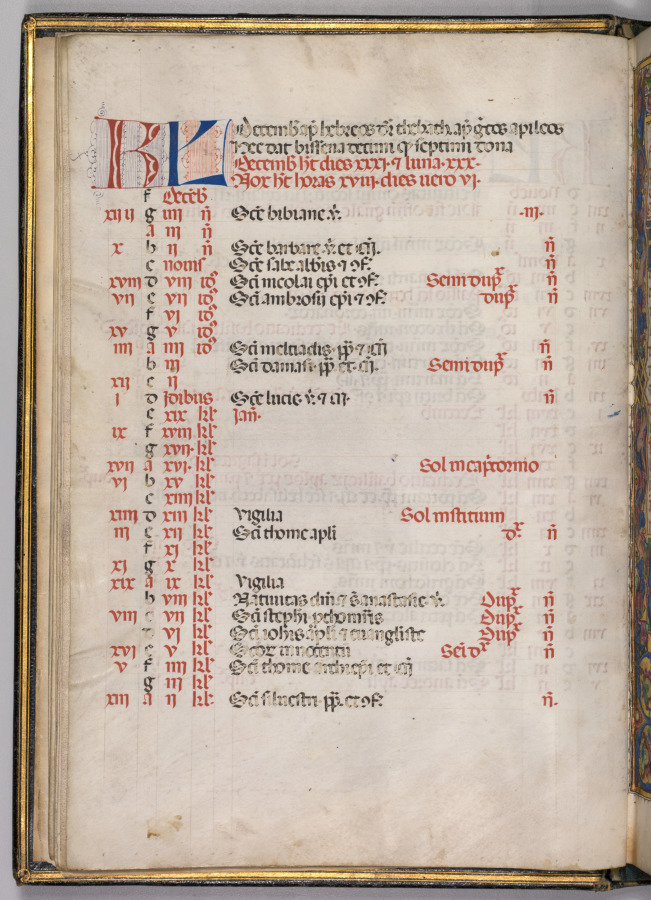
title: Missale: Fol. 8v: December Calendar Page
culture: Italy, Perugia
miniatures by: Bartolommeo Caporali (Italian, c. 1420–1503)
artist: assisted by Giapeco Caporali (Italian, d. 1478)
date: 1469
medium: ink, tempera and burnished gold on vellum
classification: Bound Volume